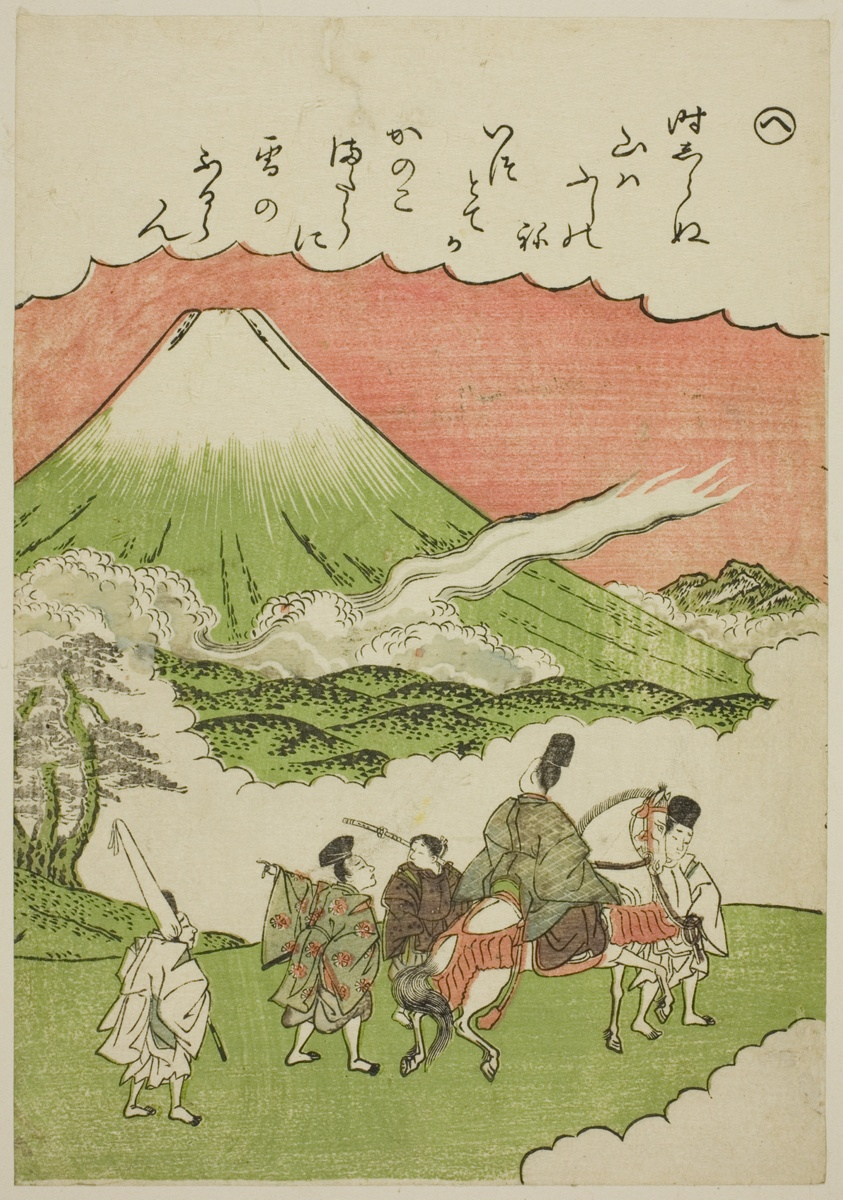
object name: Print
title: "He": Mt. Fuji, Suruga Province, from the series "Tales of Ise in Fashionable Brocade Pictures (Furyu nishiki-e Ise monogatari)"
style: Japanese (culture or style)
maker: Katsukawa Shunsho 勝川 春章; Japanese, 1726-1792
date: c. 1772/73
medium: Color woodblock print; koban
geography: Japan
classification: woodblock print; print; asian art